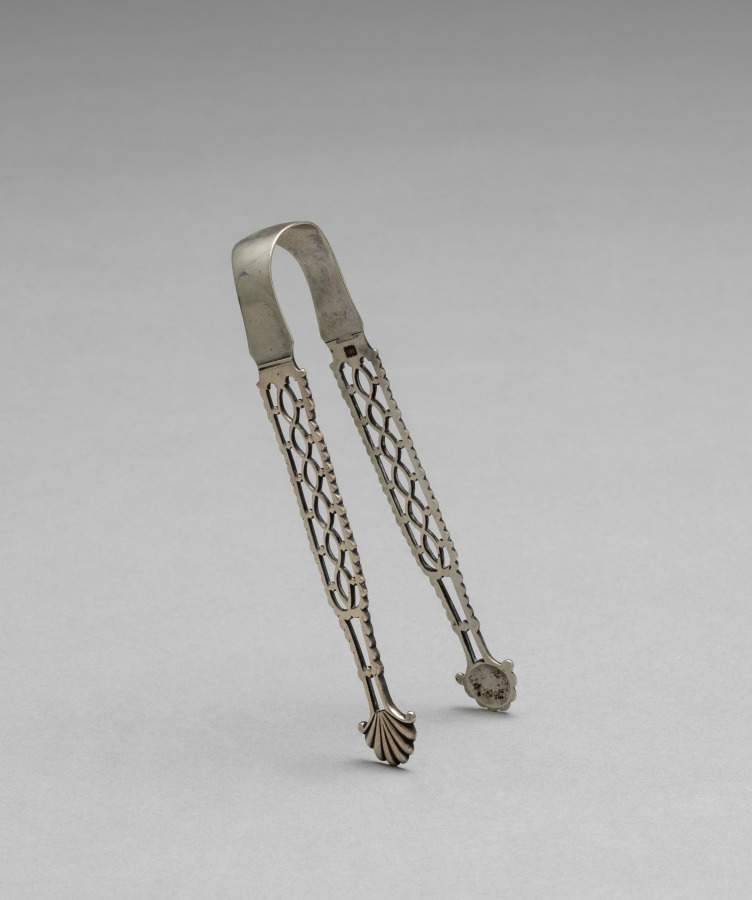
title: Sugar Tongs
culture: England, 18th century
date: 1775–1799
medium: silver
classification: Silver